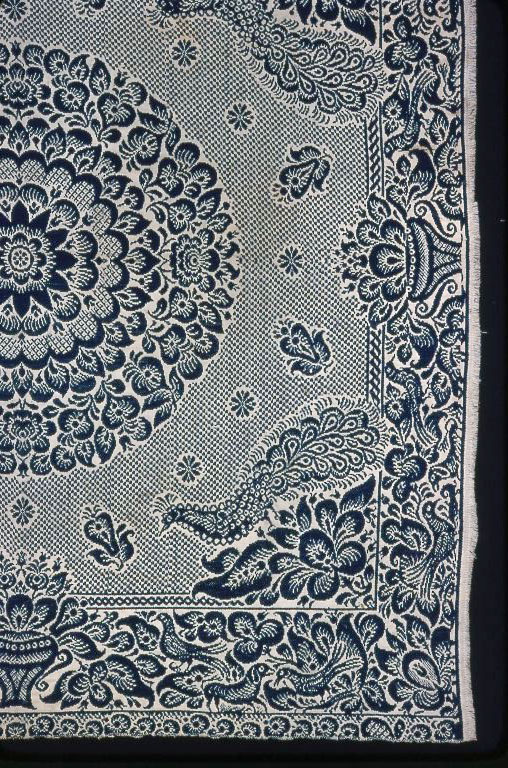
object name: Textile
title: Coverlet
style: 19th century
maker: United States, Pennsylvania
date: 1870/76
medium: Cotton and wool, plain weave with plain interlacings of secondary binding warps and patterning wefts (Beiderwand); woven on loom with Jacquard attachment; full loom width; seamless; fringed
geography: Pennsylvania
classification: weaving - coverlet; coverlet; weaving; textile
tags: peacocks, vase, foliage, scalloping, flowers, medallions, animals, birds, coverlet